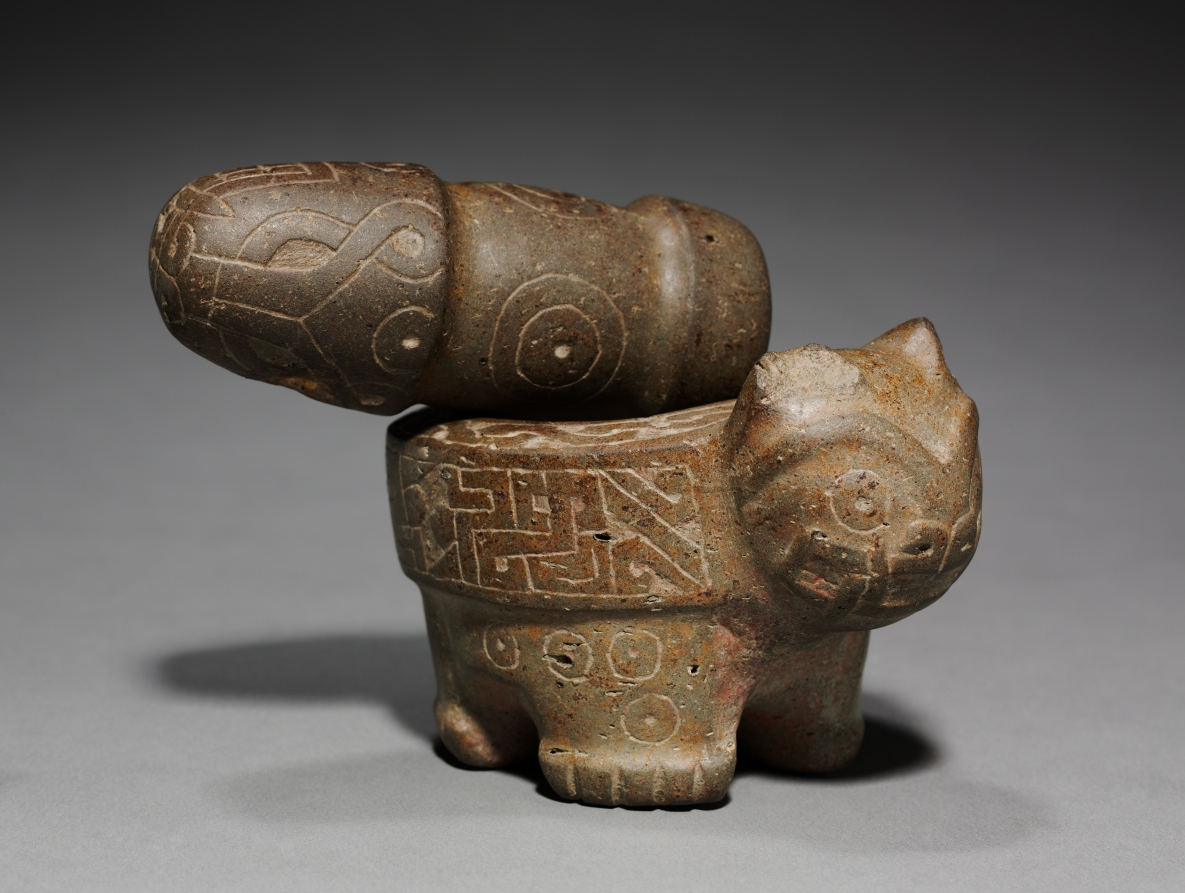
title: Feline Mortar and Pestle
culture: Peru, North Highlands, Pacopampa(?), Chavín style (900-200 BCE)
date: 700–1 BCE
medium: stone, pigment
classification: Stone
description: Size suggests that this Chavín-style mortar and pestle were not used to grind bulky staples like corn, but instead pigments or plant hallucinogens used in religious rites to achieve spiritual insight and communion with cosmic forces. This set may come from Pacopampa, a site in the northern highlands where elites adopted Chavín deities and worshiped them alongside local deities. These small sculptures illustrate the appeal and the spread of Chavín religion.